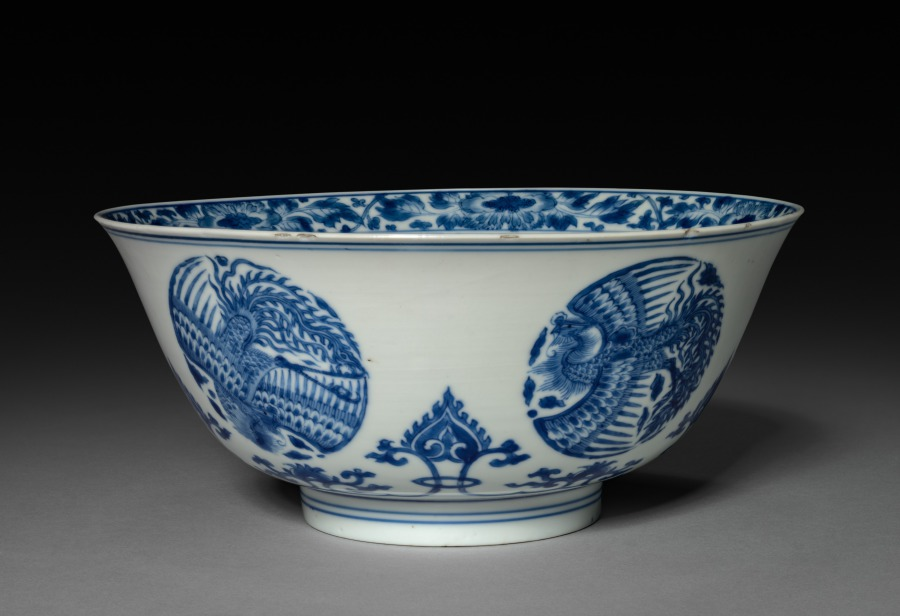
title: Bowl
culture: China, Qing dynasty (1644-1911), Kangxi reign (1661-1722)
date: 1662–1722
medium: porcelain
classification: Ceramic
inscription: 大明嘉靖年製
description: The apocryphal inscription in a double circle on the base reads "made in the Ming dynasty, Jiajing period," but the bowl was made during the reign of the Qing emperor Kangxi.